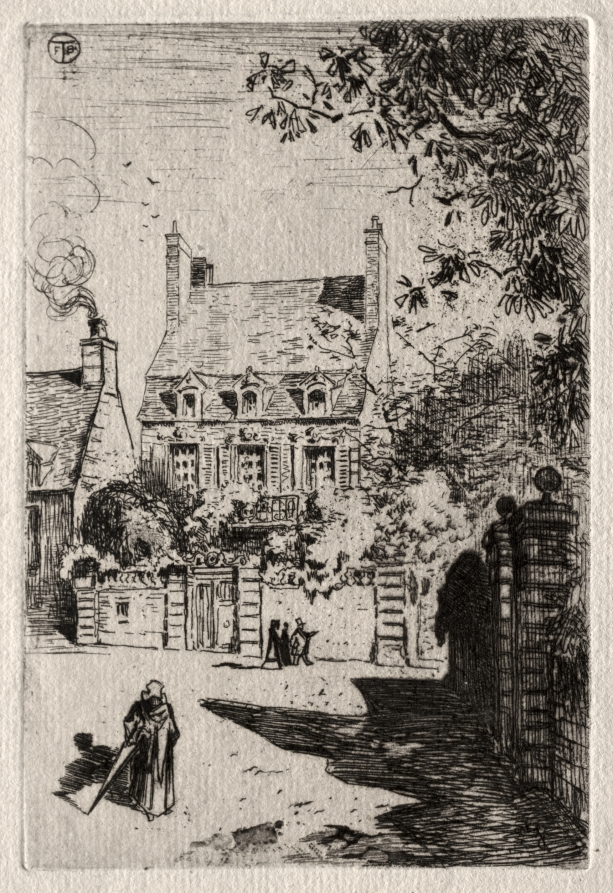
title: In Province: The House at Orléans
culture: France, 19th century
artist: Félix Hilaire Buhot (French, 1847–1898)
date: c. 1875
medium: etching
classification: Print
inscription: upper right corner, in plate: [artist's monogram]